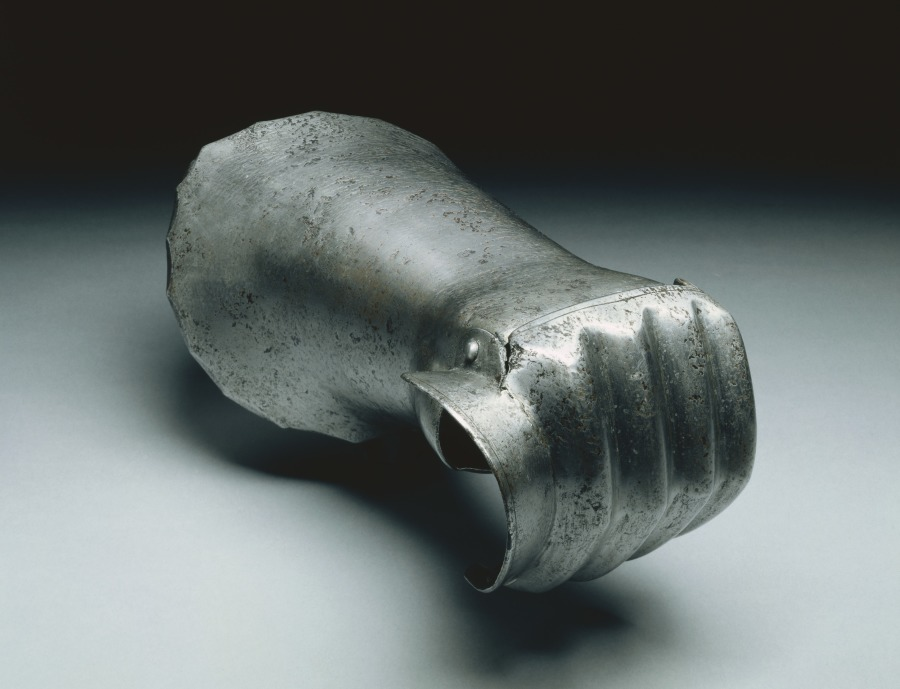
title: Jousting Glove (Main-de-Fer Gauntlet)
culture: South Germany, 16th century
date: c.1530–60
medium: steel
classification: Arms and Armor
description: This armor was developed for the joust--a sporting combat between two mounted contestants. Although all of the elements of this armor date from the same period, they are not all from the same suit. This armor is thus called "composed." It also shows the asymmetry of jousting armor. The participants rode along a wall-like barrier known as a "tilt" with their left sides facing one another. Consequently, armor on that side of the body had to be thicker. Note the large plate (grandguard) over the left shoulder for extra protection. Also, the breathing holes in the helmet were placed on the right side (farthest from an opponent's lance) to avoid injuries from splinters. The bracket attached to the right breastplate is called the lance-rest, a shock-absorbing support designed to accommodate the lance when "couched" under the right armpit.